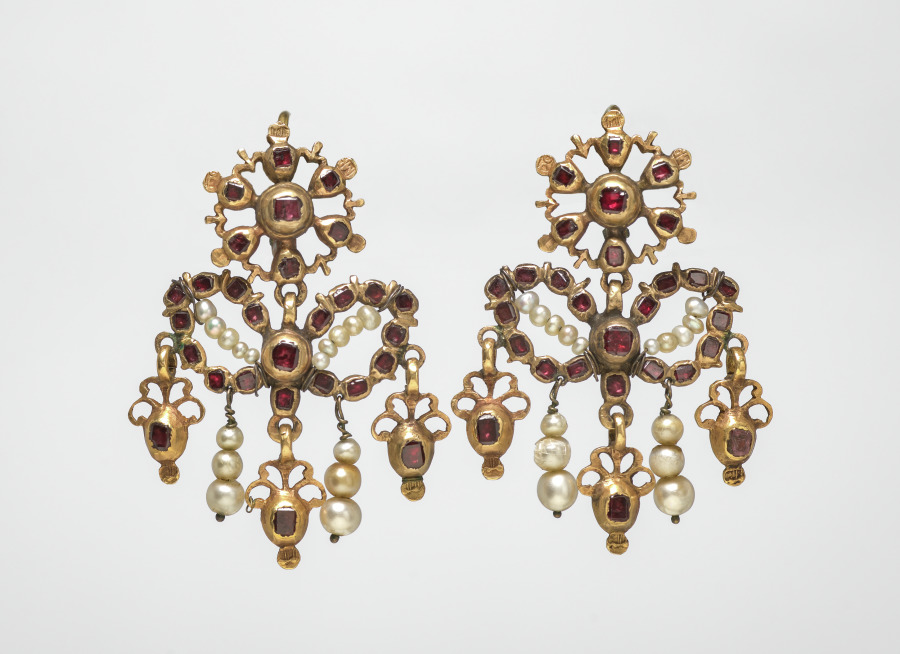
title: Woman's Costume (Earring)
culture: Italy, 19th century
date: 1800s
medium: gold and jewels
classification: Jewelry